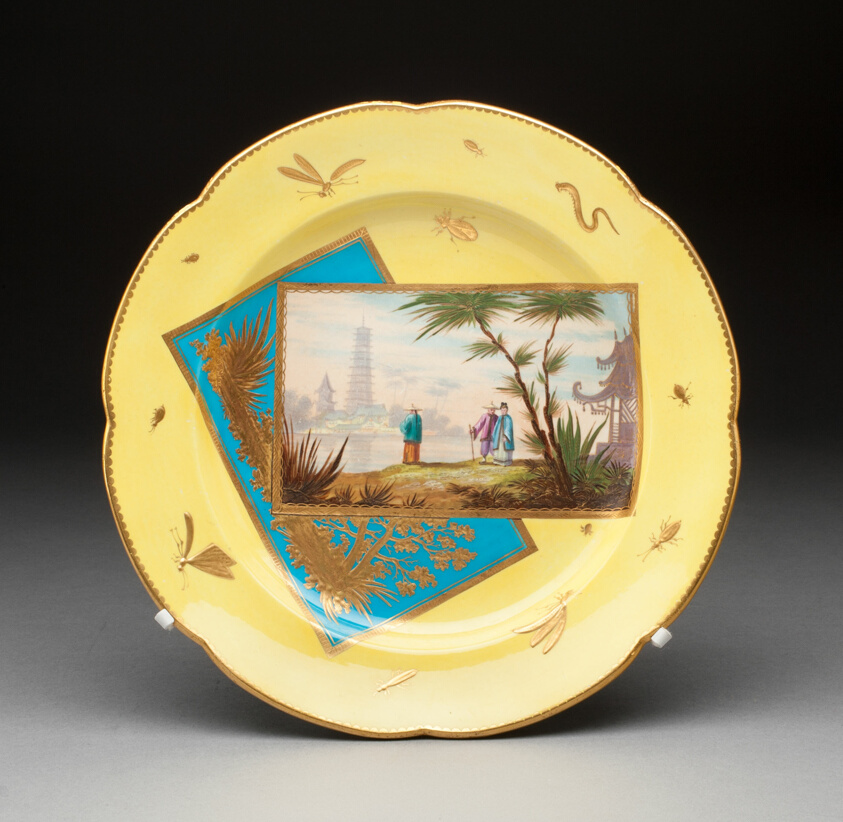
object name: Ceramics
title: Plate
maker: Coalport and Coalbrookdale Porcelain Factory (England, founded 1796)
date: 1870/75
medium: Soft-paste porcelain with polychrome enamel decoration and gilding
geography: Coalport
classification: plate (general, dish); tableware; dish (vessel); ceramics; porcelain; european decorative arts